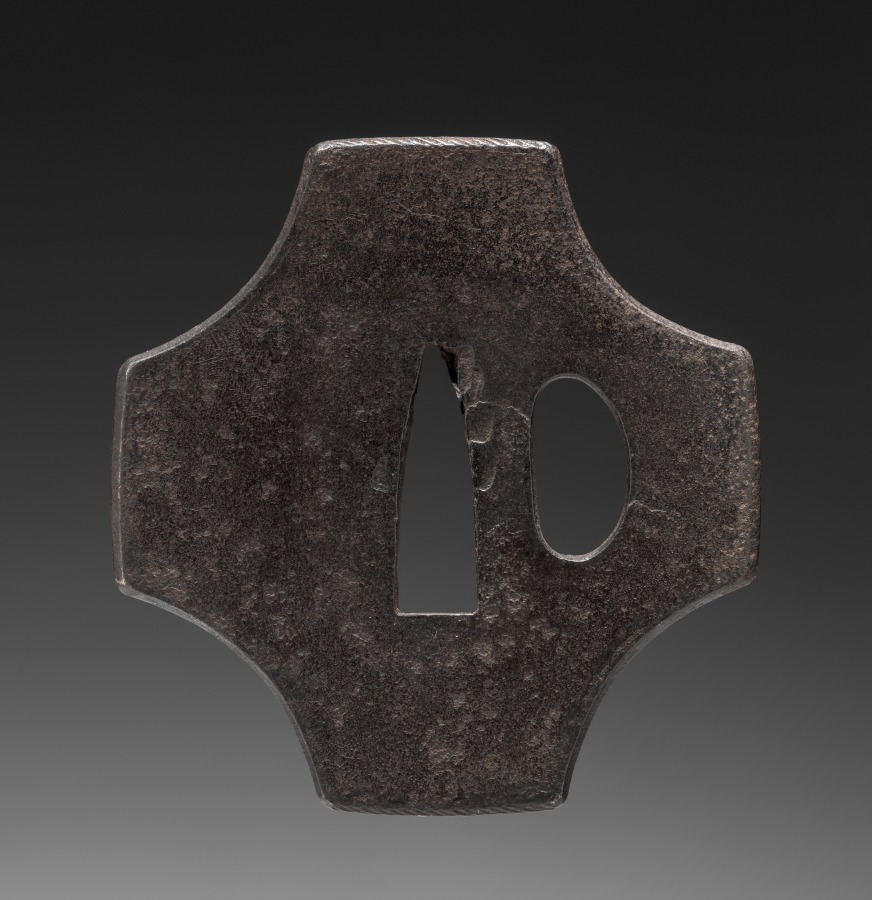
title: Sword Guard (Tsuba)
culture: Japan, possibly Edo period (1615-1868)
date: c. 1615–1868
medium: iron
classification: Arms and Armor